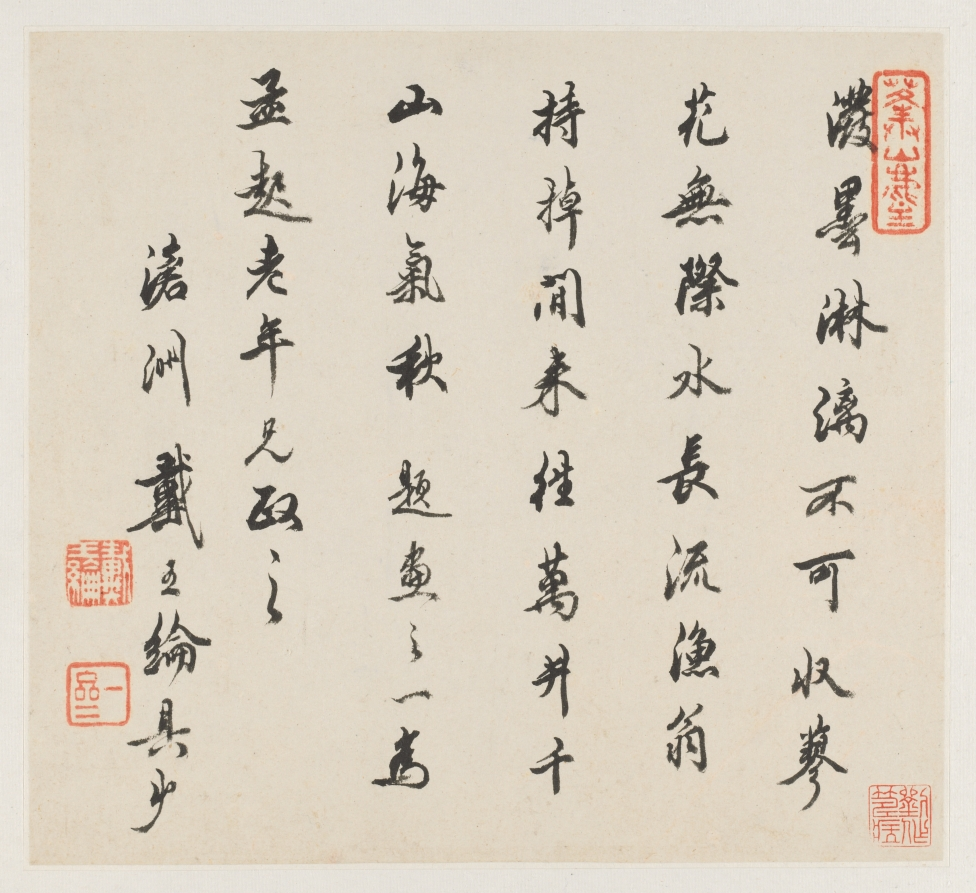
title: Album of Landscapes: Leaf 6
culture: China, Qing dynasty (1644-1911)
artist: Wang Gai (Chinese, active c. 1677–1705)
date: 1677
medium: album leaf, ink and light color on paper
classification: Painting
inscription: Poem by Tai Wang-lun